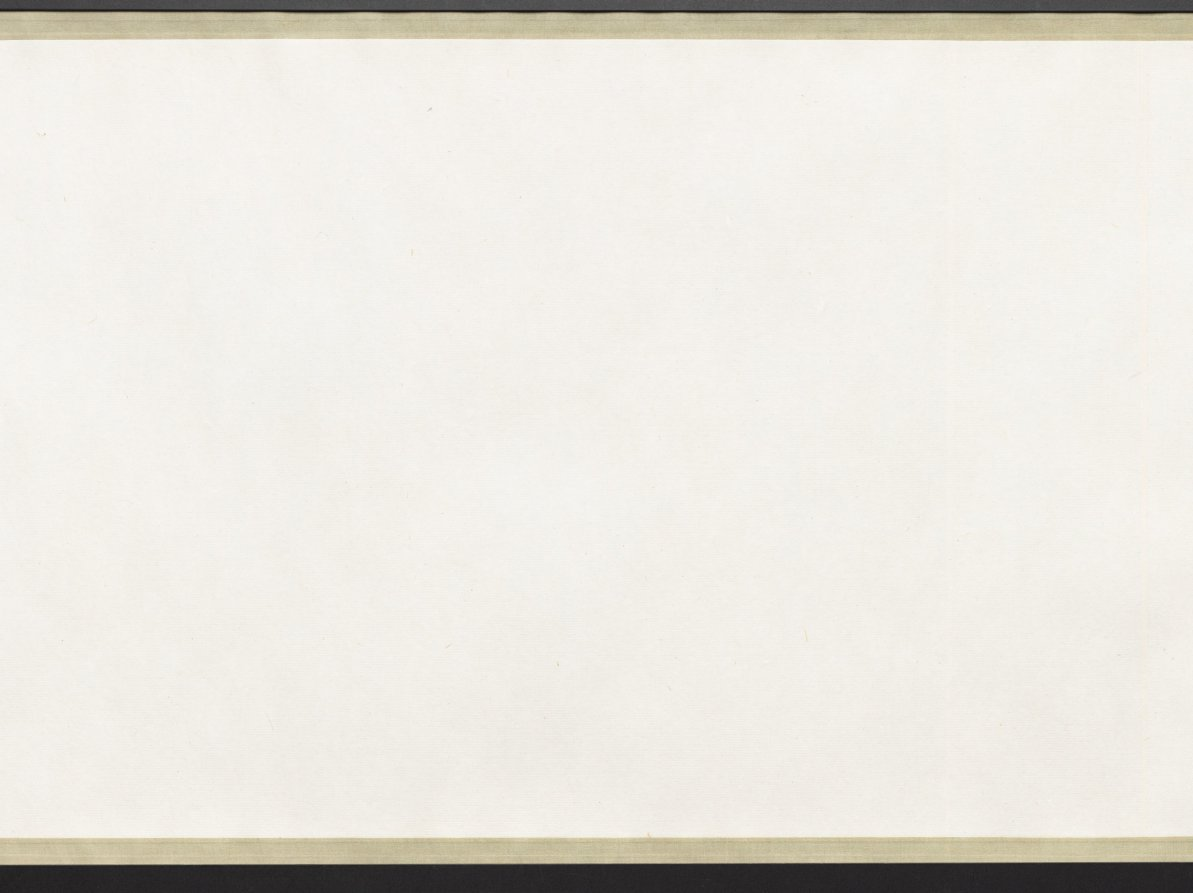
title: A Hundred Sparrows in a Lofty Grove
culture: China, Ming dynasty (1368–1644)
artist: attributed to Lin Liang (Chinese, 1416–1480)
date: 1368–1644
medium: handscroll; ink on silk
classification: Painting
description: Sparrows engaged in all kinds of activities frolic amid leafy branches, blades of grass, rocks, and a waterfall. As our eyes move over the scroll, the artist engages us in enjoying the sparrows’ carefree movements in a natural setting. The charming birds were painted from close observation in swift and fluent brushstrokes. Sparrows are a common bird and in Chinese painting they often represent the commoner in human society as opposed to the noble pheasant or peacock representative of the ruling class.